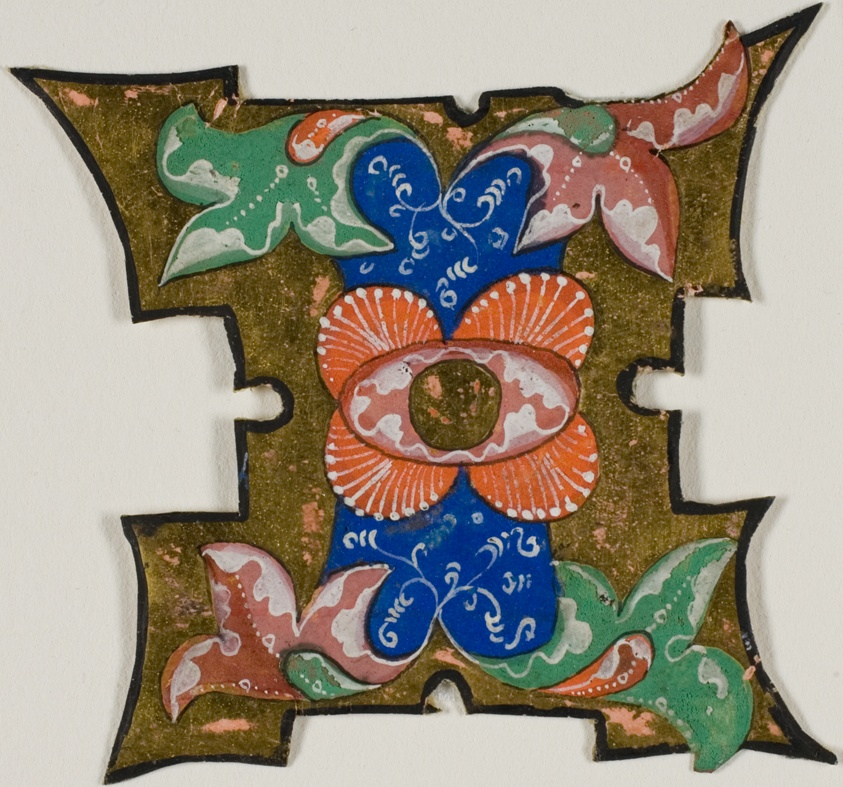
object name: Drawing and Watercolor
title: Decorated Initial "I" with Leaves from a Choir Book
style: medieval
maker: European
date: 14th century or modern, c. 1920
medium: Manuscript cutting in tempera and gold leaf on vellum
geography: Europe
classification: tempera; manuscript; drawings (visual works); prints and drawing